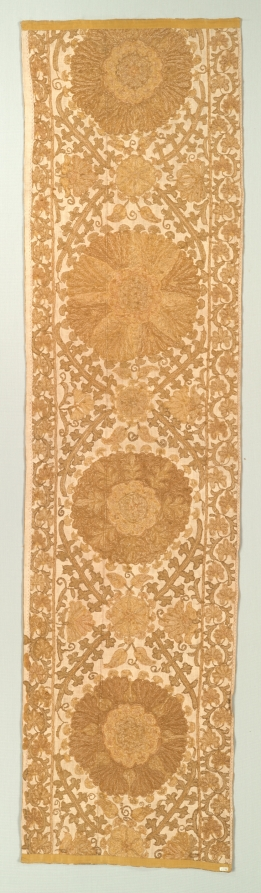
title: Panel, Probably from a Curtain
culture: Uzbekistan, Bukhara, 19th century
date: 19th century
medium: embroidery: silk on cotton tabby ground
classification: Embroidery